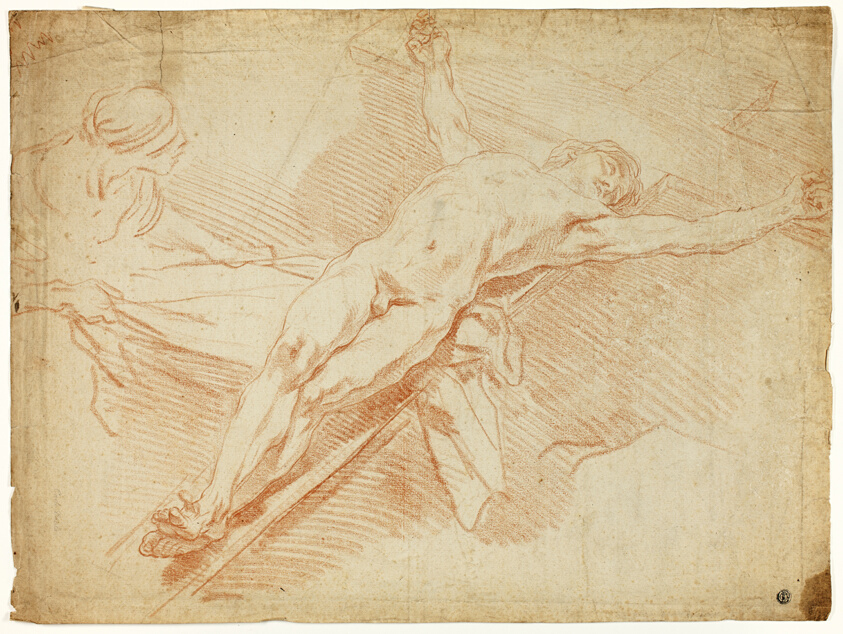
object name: Drawing and Watercolor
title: Christ on the Cross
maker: Possibly Charles Andre Van Loo (French, 1705-1765); style of Edme Bouchardon (French, 1698-1765)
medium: Red chalk on cream laid paper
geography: France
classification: chalk; paper; drawings (visual works); prints and drawing